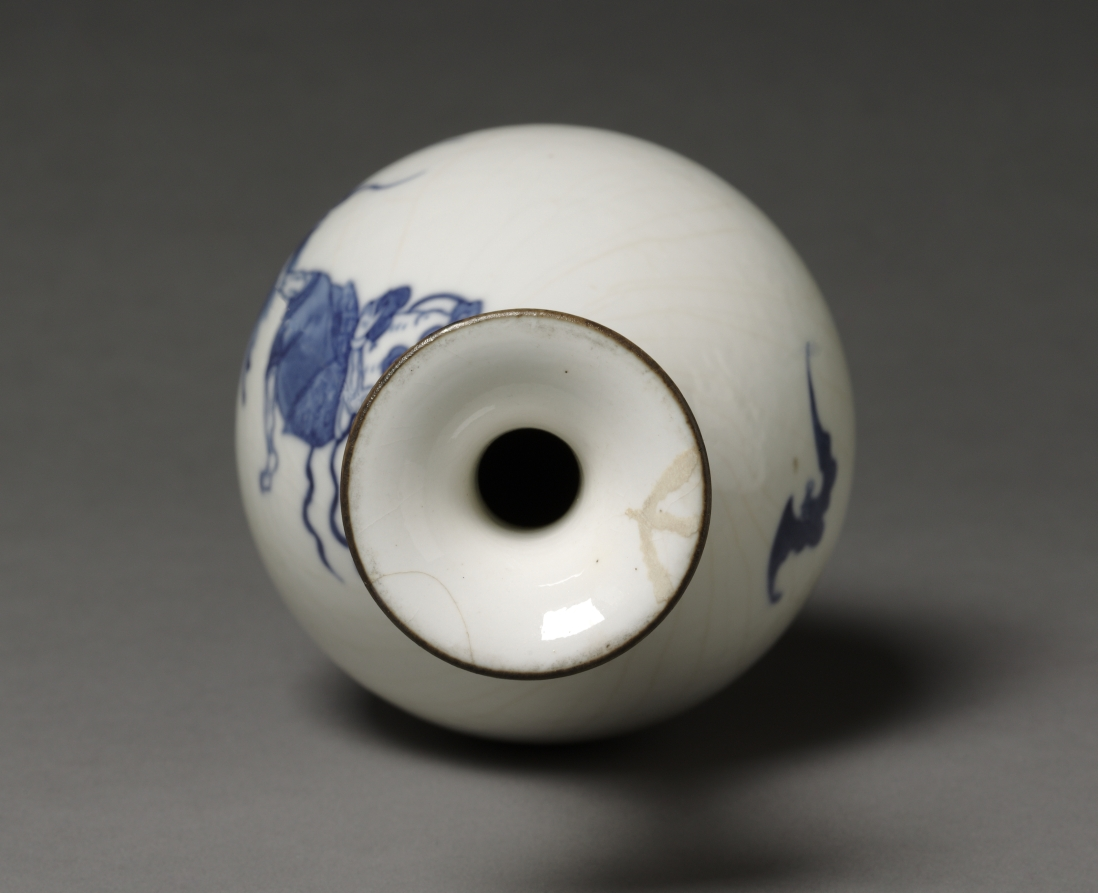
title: Pear-Shaped Vase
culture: China, Jiangxi province, Jingdezhen kilns, Qing dynasty (1644-1911), Yongzheng reign (1723-35)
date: 1723–35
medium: porcelain with underglaze blue decoration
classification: Ceramic